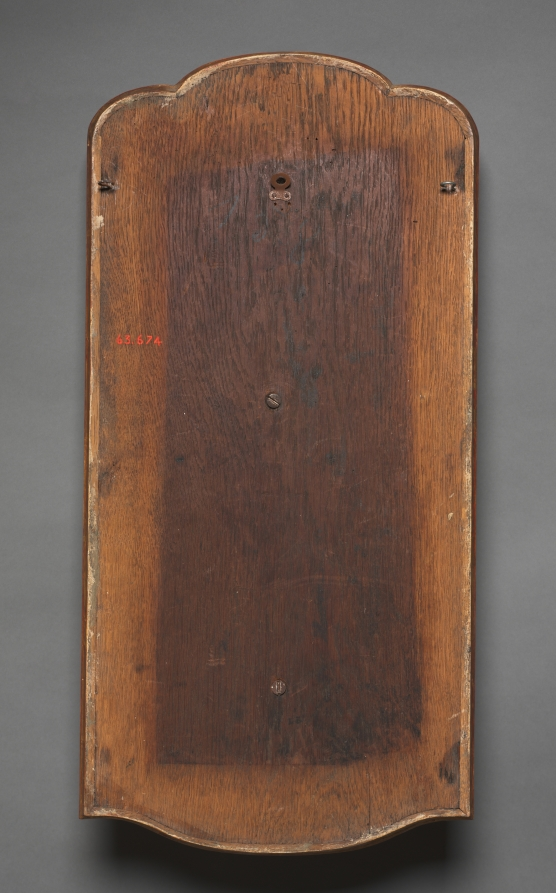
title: The Immaculate Conception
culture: Germany, Würzburg, 18th century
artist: assisted by Johann Peter Alexander Wagner (German, 1730–1809)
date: c. 1765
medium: painted wood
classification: Sculpture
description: This work has been associated with Johann Pieter Wagner, one of the leading Austrian sculptors of the second half of the 18th century. Because of its small size, it was most likely either a model for a larger altarpiece or an object designed for private devotion. Gold serves as celestial decoration around the border and on the figures. The Virgin Mary stands upon billowing clouds held up by angels, a variant on the Madonna of Victory, which features Mary or Jesus holding a spear. Mary holds the infant Jesus, while trampling a serpent-symbolizing the triumph of good over evil. The holy child holds a bouquet of flowers, representing his ability to bestow grace, expressing the benevolence associated with the cult of the Immaculate Conception.